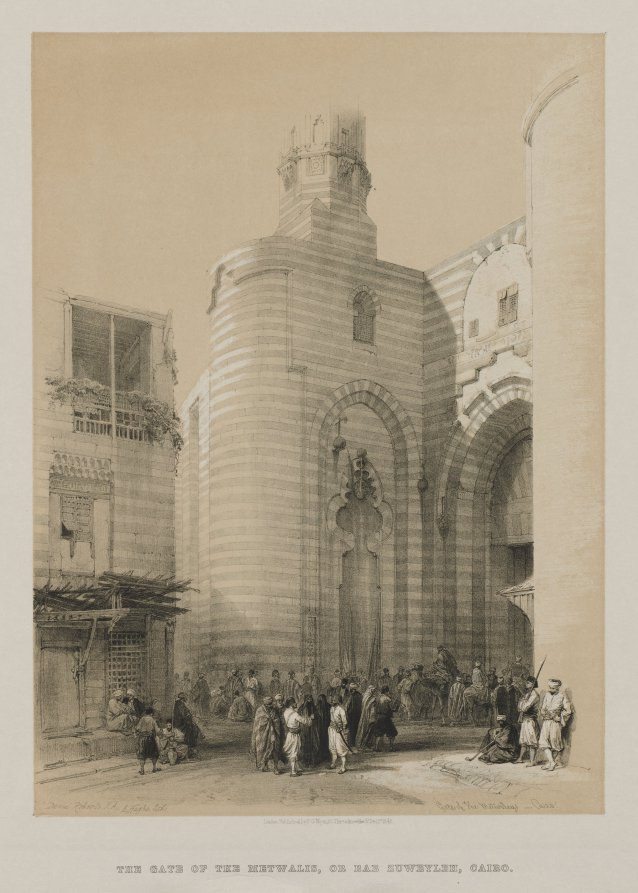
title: Egypt and Nubia, Volume III: Gate of the Metwaleys, Cairo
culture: England, 19th century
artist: Louis Haghe (British, 1806–1885)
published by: F. G. Moon, 20 Threadneedle Street, London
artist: after David Roberts (Scottish, 1796–1864)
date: 1848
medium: color lithograph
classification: Print